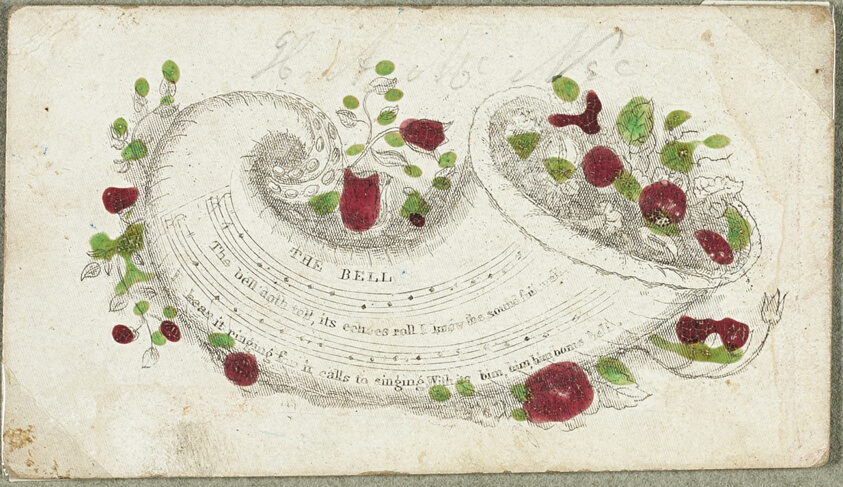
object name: Print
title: The Bell (valentine)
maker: Unknown Artist; American or English, 19th century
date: c. 1830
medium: Engraving with hand-coloring on ivory card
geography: United States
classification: valentine; prints and drawing; print